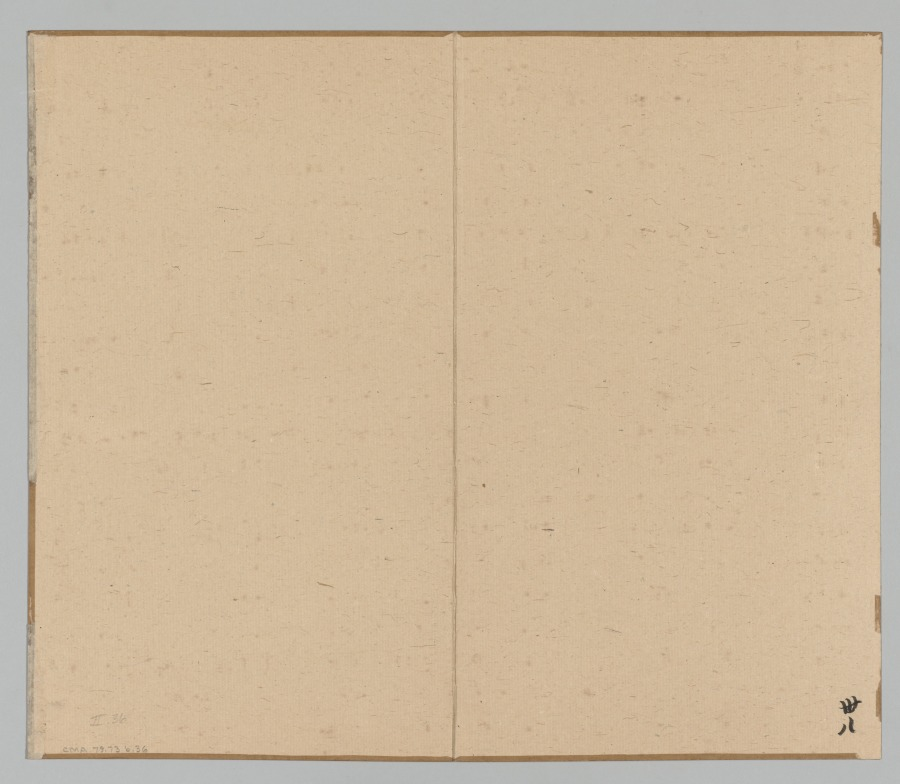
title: Postscript from “Reverberations of Taiga”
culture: Japan, Meiji period (1868–1912)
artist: Aoki Shukuya (Japanese, d. 1802)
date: 1910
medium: double-leaf from a pair of albums; ink on silk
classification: Portfolio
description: Kusakabe Meikaku, one of the three most famous Japanese calligraphers of his time, provided a title leaf, CMA 1979.73.1.1, for a pair of albums of paintings after Ike Taiga (池大雅) (1723–1776) by his student Aoki Shukuya (青木夙夜) (died 1802). Murata Kōkoku, a well-traveled painter with an extensive network of colleagues in China and Japan, wrote a postscript for the albums in which he explained that the paintings are faithful copies after Taiga’s images of rocks, mountains, residences, and so forth. These two artists respectfully documented Shukuya’s work more than 100 years after his death.